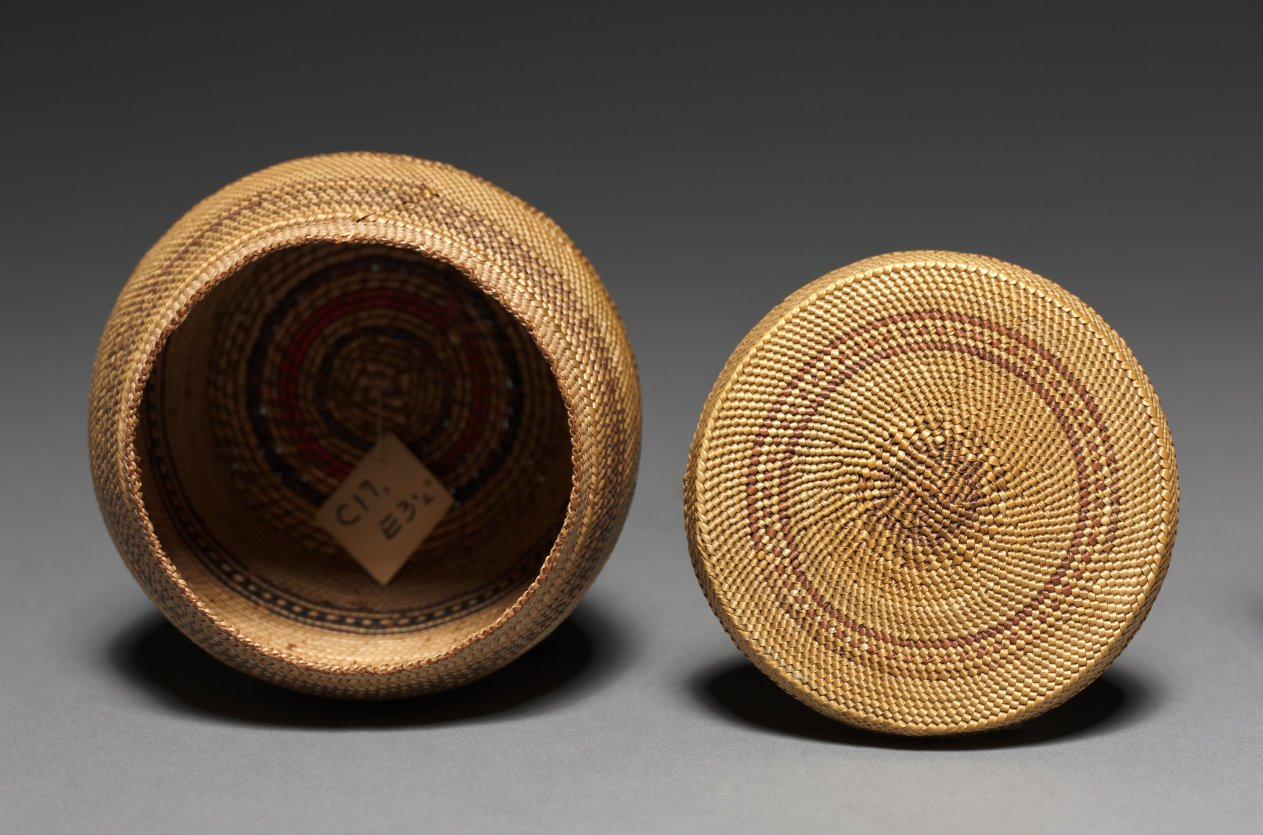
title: Covered Bowl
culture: Northwest Coast, Vancouver Island, late 19th century (?)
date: c. 1875–1900?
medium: twined grass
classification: Basketry